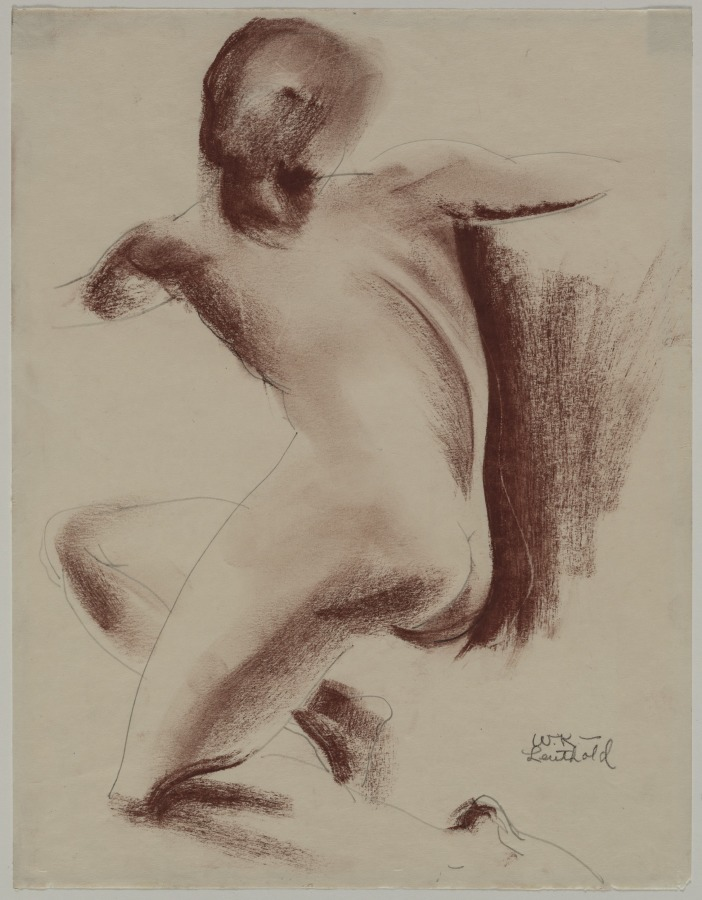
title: Nude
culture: America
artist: William K. Leuthold (American)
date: c. 1929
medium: pencil and brown chalk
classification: Drawing